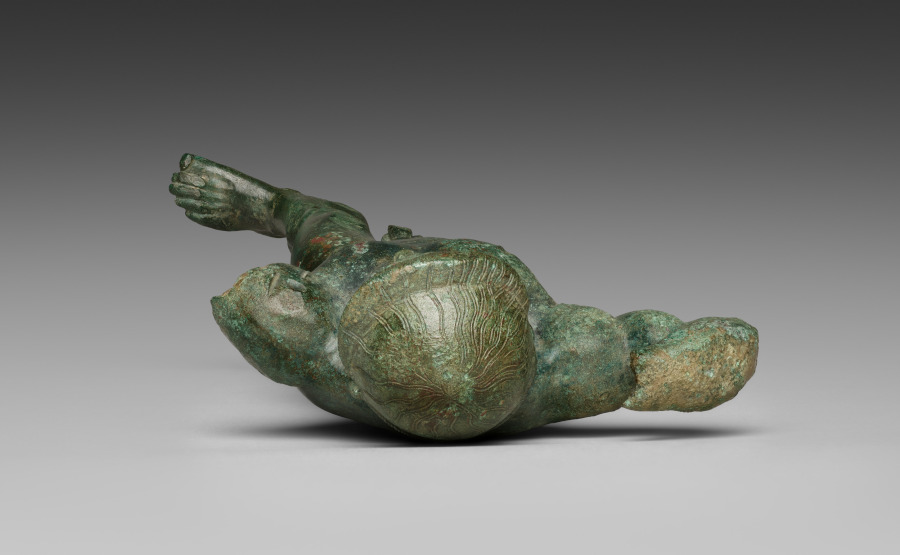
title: Statuette of Herakles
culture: Greek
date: 510–500 BCE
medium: bronze (solid cast)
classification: Sculpture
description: Striding forward with his left foot, this nude figure turns his torso and raises his tightly bent right arm behind his head. Despite significant damage, the statuette conveys a naturalistic sense of form and movement rarely seen in early Greek art. Its most striking feature is its powerful physique, with sharply defined, bulging muscles. Formerly called an athlete and assumed to have held a javelin or discus, the figure likely depicts the hero Herakles, revered for his strength and often shown in this smiting pose, wielding a club. Though usually bearded in this period, this representation emphasizes his youthfulness, with an idealized face and carefully arranged hair.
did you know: This robust figure exudes power, despite his damaged feet and missing hands.